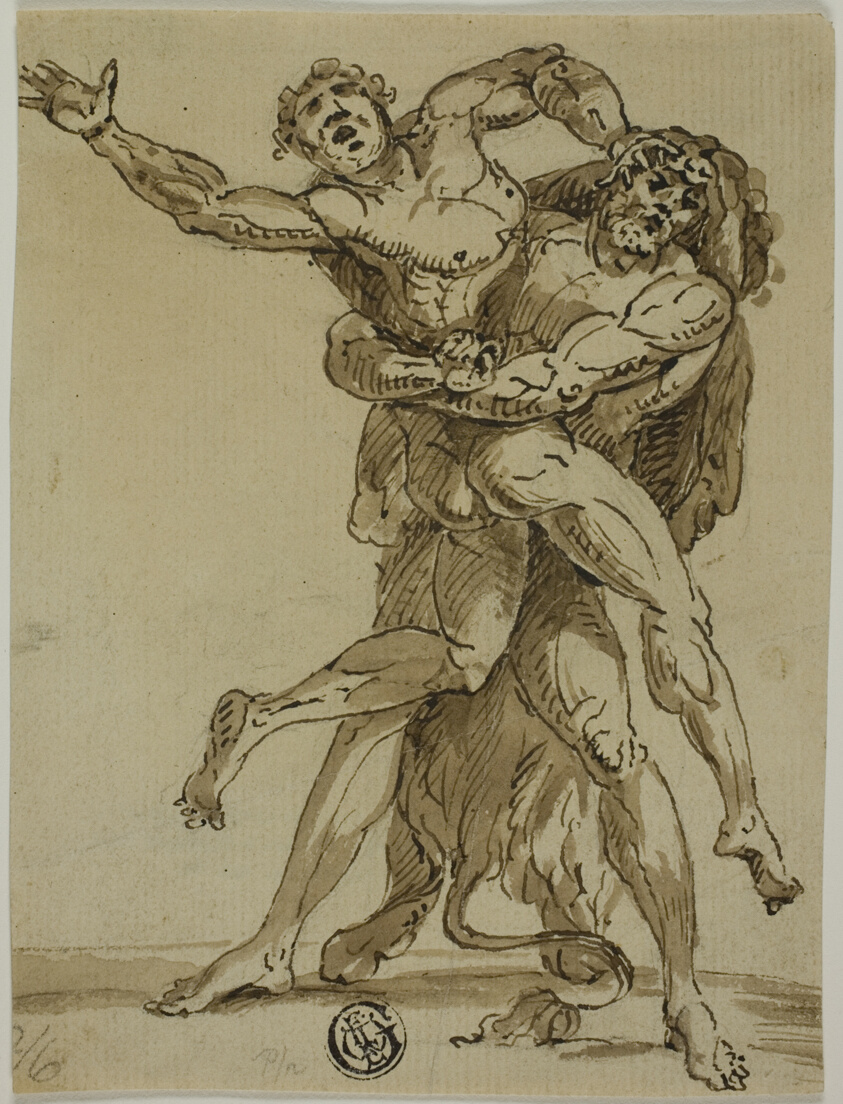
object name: Drawing and Watercolor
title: Hercules and Antaeus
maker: Unknown Artist; Italian, 17th century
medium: Pen and brown ink, with brush and brown wash, on tan laid paper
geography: Italy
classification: pen and ink drawings; drawings (visual works); prints and drawing